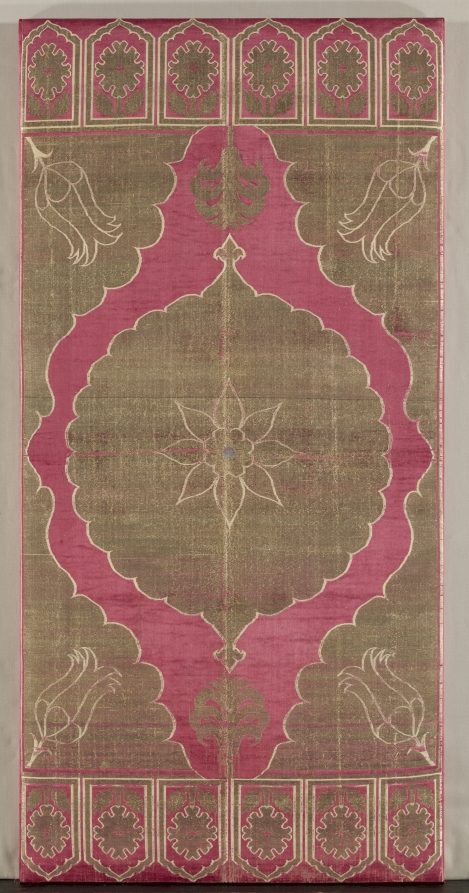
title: Lampas silk cushion cover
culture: Turkey, Istanbul or Bursa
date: early 1600s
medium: lampas: silk and gilt-metal thread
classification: Textile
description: Cushion covers, associated with comfort, were made especially to cover cushions placed on divans, the equivalent of sofas. Most were woven in brocaded velvet because the projecting pile could withstand abrasion more effectively than this rare brocaded silk example. Cushion covers typically display a row of six lappets (flaps or folds) across each end of a field decorated with either a repeating motif or a medallion pattern as shown here. Opulent gilt-metal thread forms the elegant minimalist pattern on a lustrous crimson silk ground. All the designs—the medallion and corner medallions, central rosette, and corner tulips, plus the lappets bearing rosettes—are outlined in silhouette.